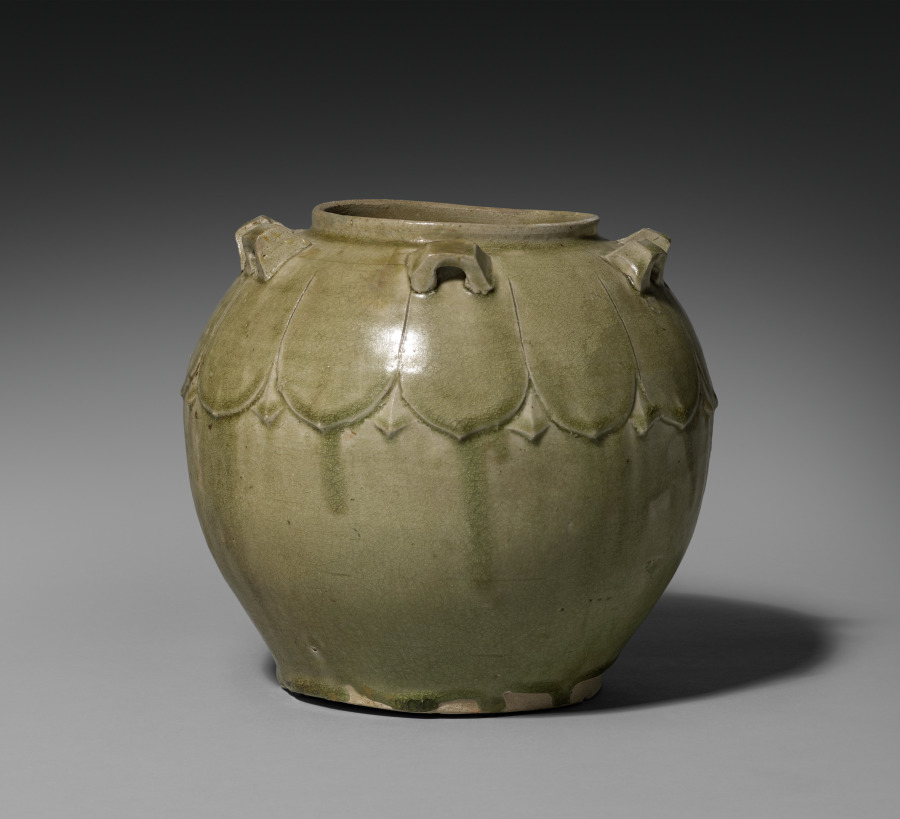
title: Covered Jar with Carved Lotus Petals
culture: China, Northern Dynasties period (386-581)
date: 386–581 CE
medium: Glazed stoneware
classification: Ceramic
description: This jar still has its original cover, which is rare among surviving examples. Its missing knob most likely had the shape of a lotus bud. Beautifully carved lotus petals cover the vessel’s shoulder and lid under a translucent green glaze. In Buddhism, the lotus is a flower symbolizing purity and detachment from worldly affairs; its presence suggests that this vessel was meant to be used in a religious context. The well-crafted double loop handles may have held a silk cloth or other textile that would have been folded over the lid to keep it in place. This aesthetic prefigures the celebrated green celadons in adjacent regions.